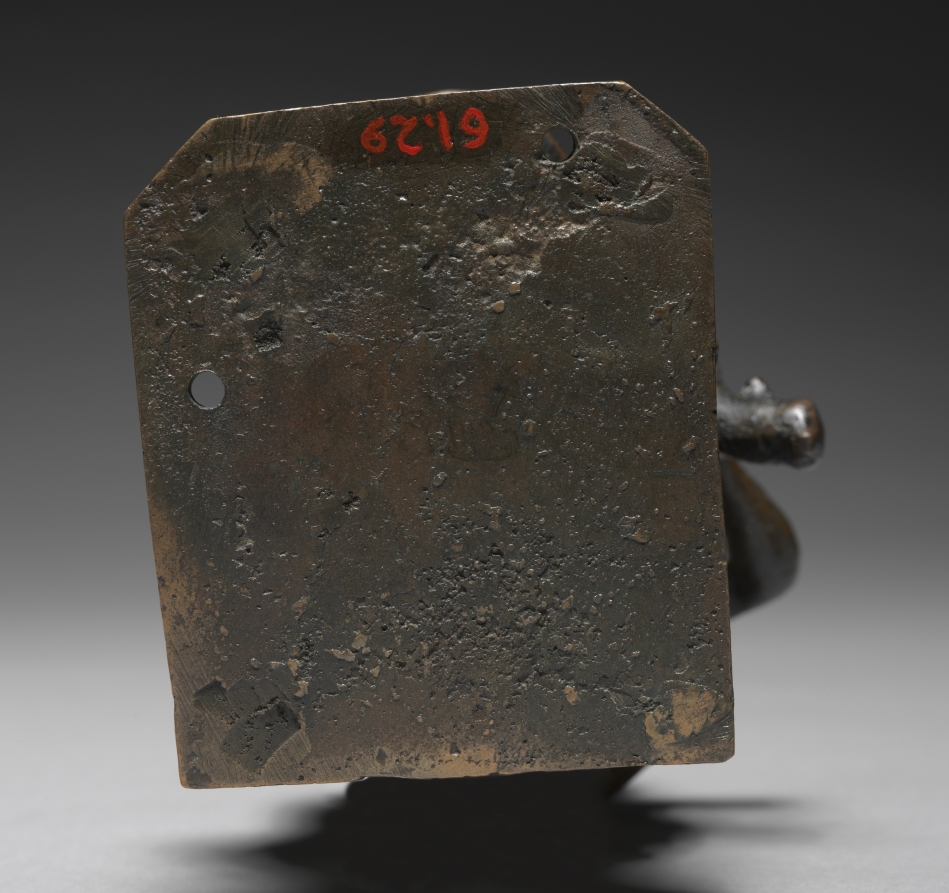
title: Adam and Eve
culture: Germany, Nuremberg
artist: workshop of Peter Vischer (German, 1487–1528)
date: c. 1520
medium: bronze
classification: Sculpture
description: The figures of Adam and Eve embrace on a bench. Together, the figures straddle an upright cornucopia that is meant to serve as an inkwell. The drapery strewn across the figures' laps—and thus covering their genitals—suggests that the scene takes place after the Fall. One can see a remnant of the Tree of Life to the right of Eve. Numerous bronze inkwells of the period survive, though they usually feature a single figure, usually allegorical, and not such an elaborate composition as seen here. This inkwell was formerly in the collection of the Duke of Arenberg, a noble house of the Habsburg Netherlands. The Vischers (Hermann I, Peter the elder, Hermann II, Peter the younger, Hans, Jakob, Paulus, and Georg) were the most renowned bronze casters of Renaissance Nuremberg, and had drawn patrons from across Europe. Because of certain ambiguities in its style, in the past the inkwell had been attributed to Georg Vischer. Stylistically, it resembles some of the miniature figures in Peter Vischer the younger's Shrine of St. Sebald (Church of St. Sebald, Nuremberg), portions of which had been cast at approximately the same time. South German bronze foundries in the sixteenth century would often adapt stylistic elements of Venetian bronzes to suit local tastes, and this inkwell is a product of this phenomenon.